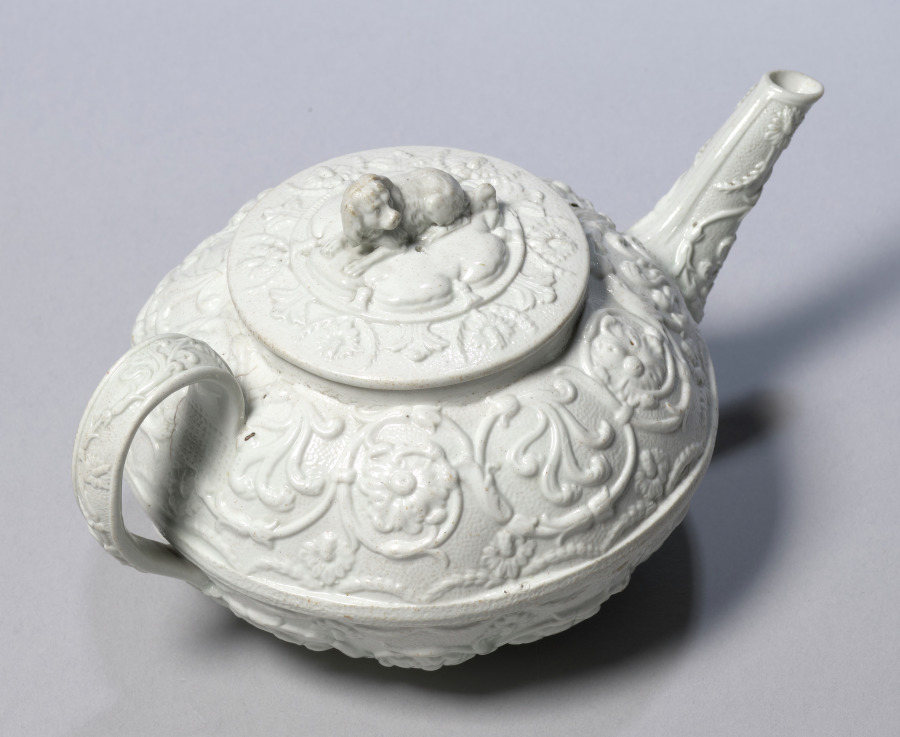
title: Teapot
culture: England, Staffordshire, 19th century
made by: Wedgwood Factory (British)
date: c. 1830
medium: stoneware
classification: Ceramic